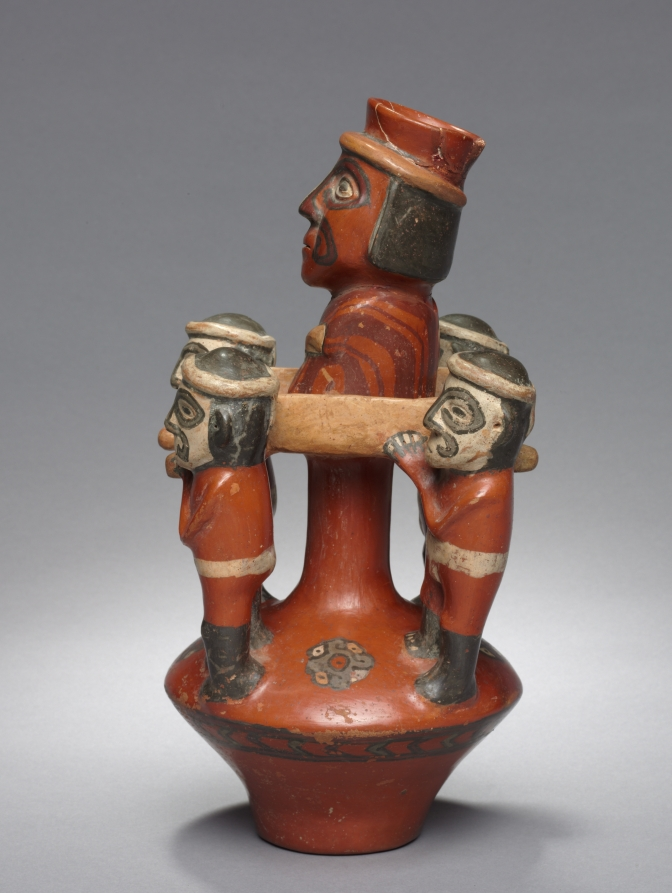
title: Vessel with Litter Group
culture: Central Andes, central highlands, reportedly Wari Wilka, Wari style, 6th-10th century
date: 600–1000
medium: ceramic and slip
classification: Ceramic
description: The sculptural scene atop this vessel's chamber depicts four porters who carry a dignitary in a litter, a high-status mode of transport. Reportedly found at Wari Wilka, a highland water shrine, the vessel empties via a long channel that passes through the body of the dignitary.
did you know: Litters were a mode of transportation reserved for people of high social status.